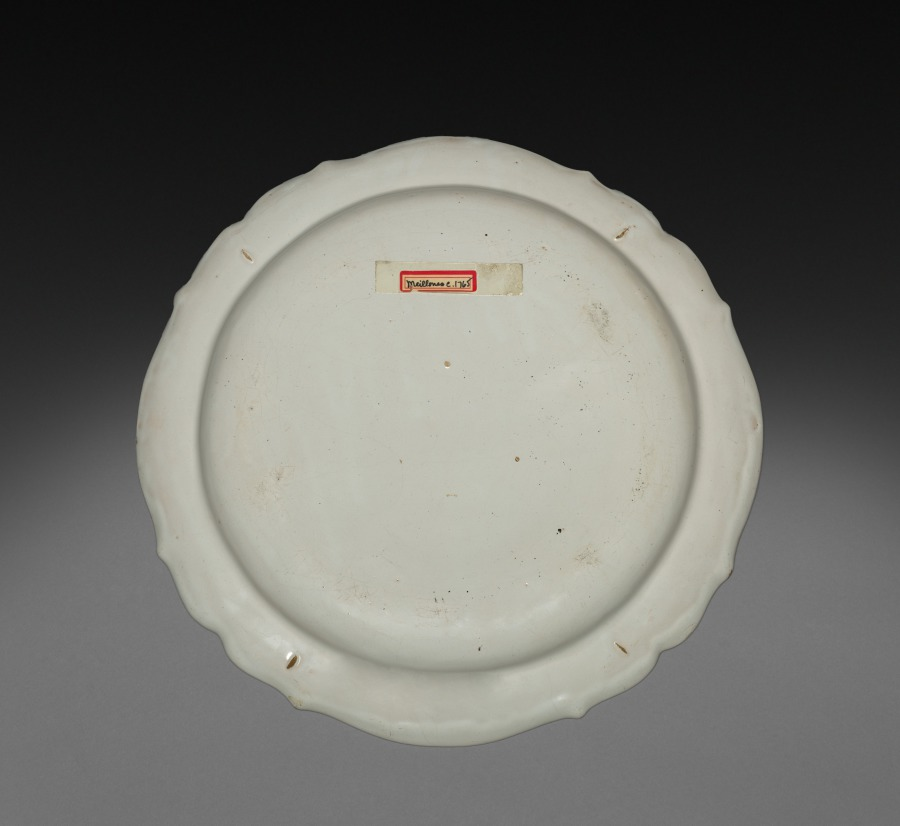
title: Plate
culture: France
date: c. 1750–70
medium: faience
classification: Ceramic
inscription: Tag on the back of plate reads "Meillones c. 1765"